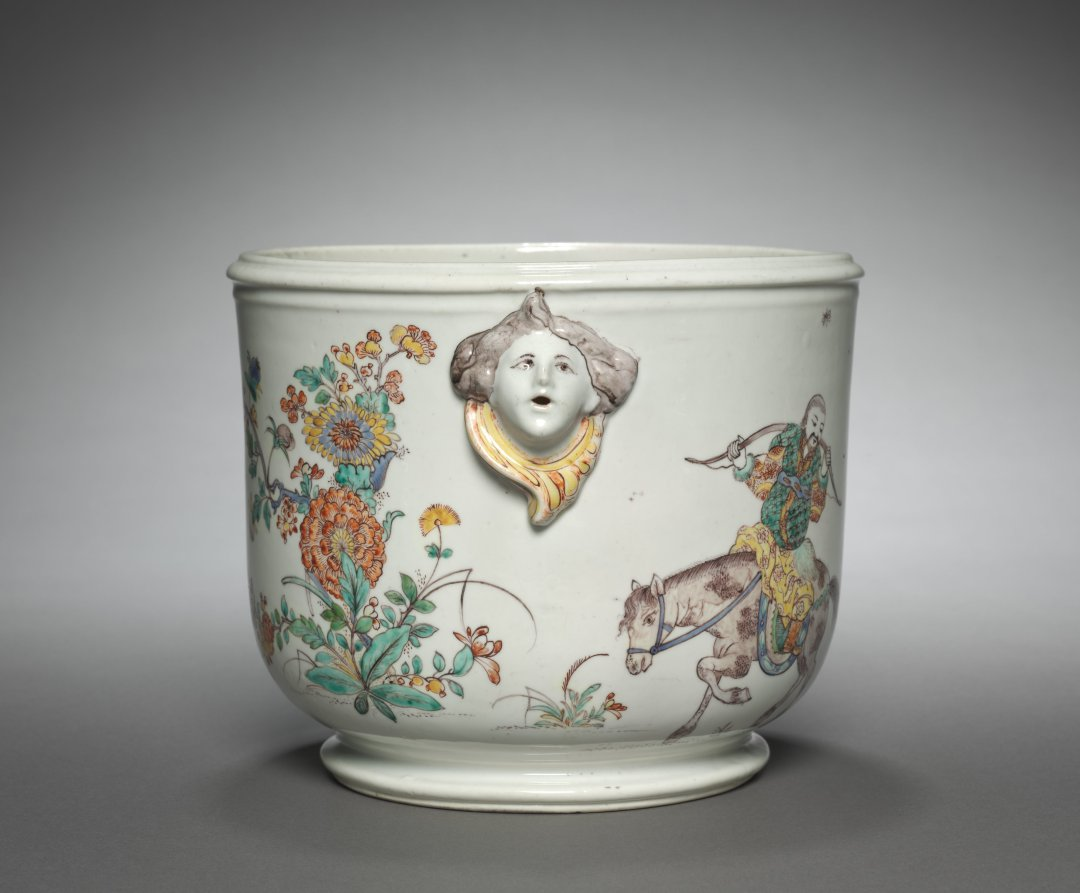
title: Bottle Cooler (seau à bouteille)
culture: France, Mennecy, 18th century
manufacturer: Mennecy- Villeroy Factory (French)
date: c. 1755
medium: Tin-glazed soft-paste porcelain with enamel decoration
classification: Ceramic